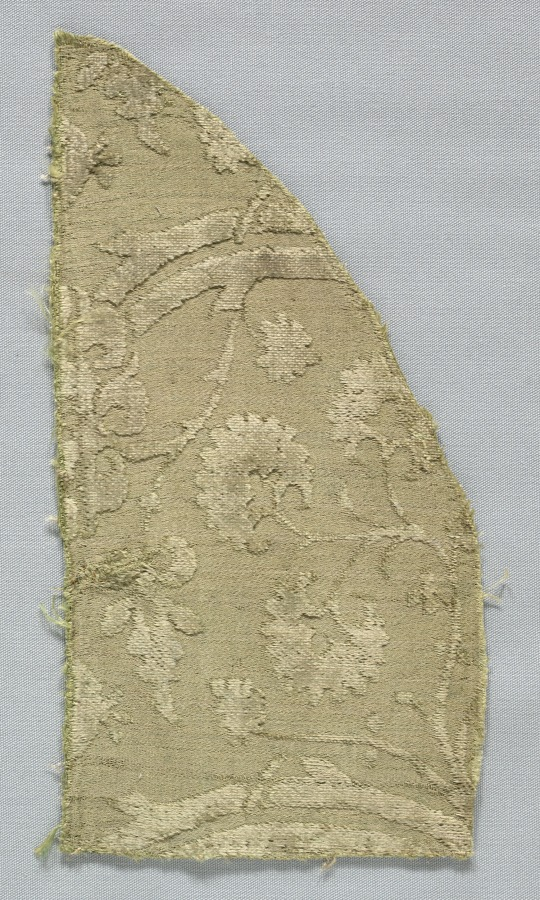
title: Fragments of a Chasuble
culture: Italy, beginning of the 15th century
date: 1400–1420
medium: velvet (cut and voided); silk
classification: Velvet